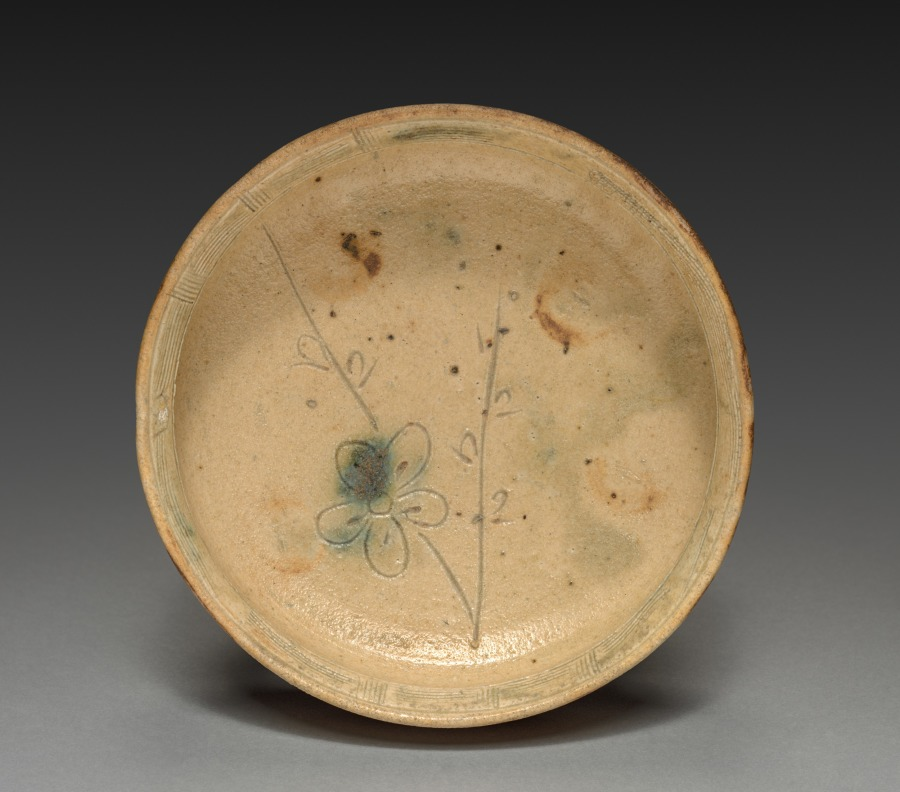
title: Bowl: Yellow Seto Ware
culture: Japan, Momoyama period (1573–1615)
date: c. 1590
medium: glazed stoneware with incised decoration (Seto ware)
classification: Ceramic